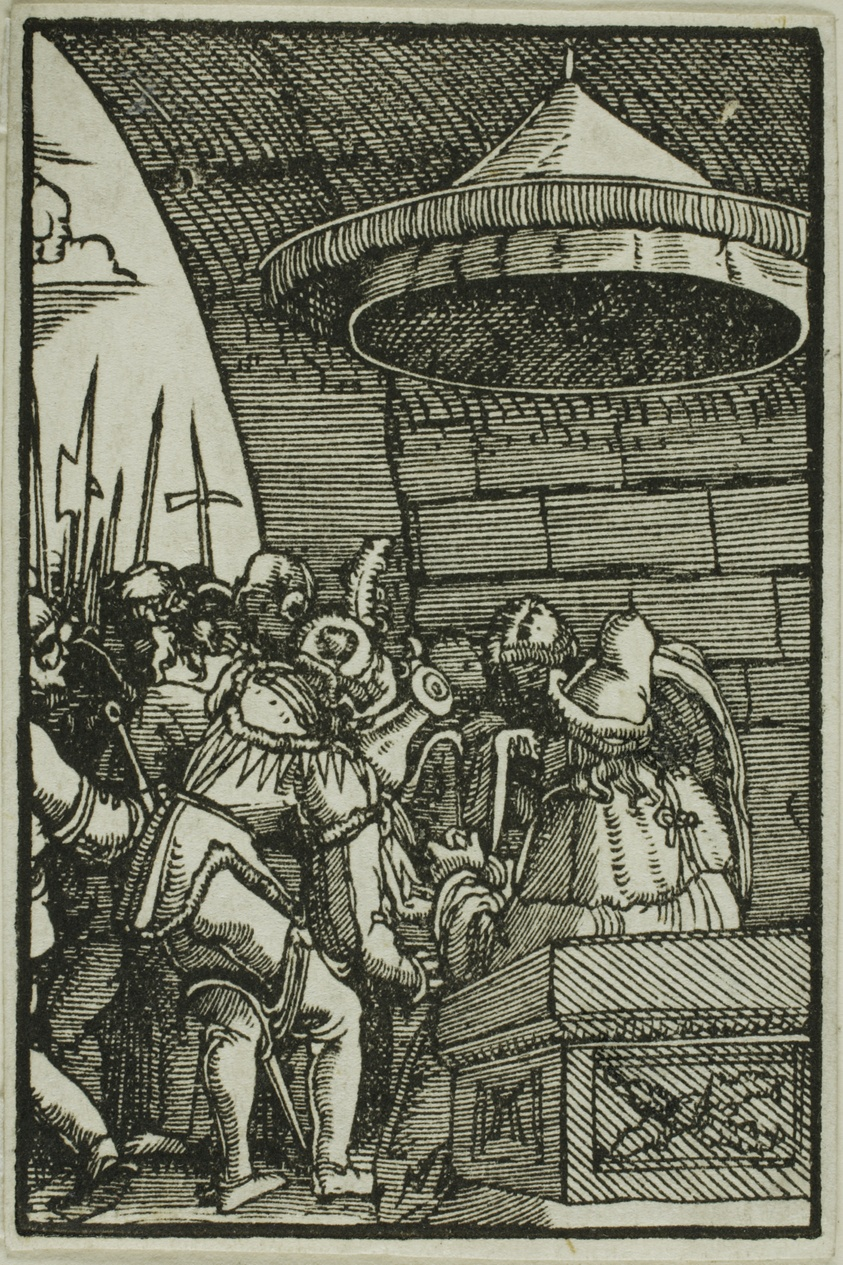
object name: Print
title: Pilate Washing His Hands, from The Fall and Redemption of Man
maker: Albrecht Altdorfer (German, c.1480-1538)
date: 1513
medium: Woodcut in black on ivory laid paper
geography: Germany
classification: woodcut; print; prints and drawing